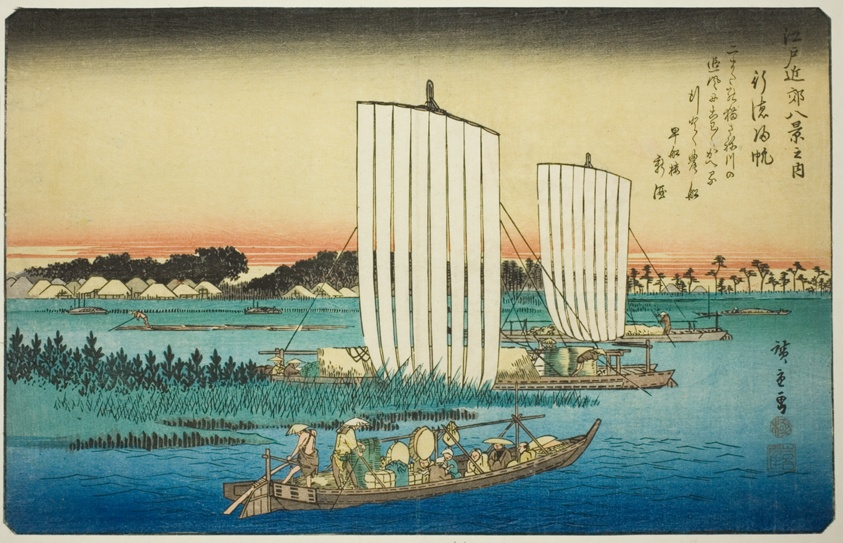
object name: Print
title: Returning Sails at Gyotoku (Gyotoku no kihan), from the series "Eight Views in the Environs of Edo (Edo kinko hakkei no uchi)"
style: Japanese (culture or style)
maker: Utagawa Hiroshige 歌川 広重; Japanese, 1797-1858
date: c. 1837/38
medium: Color woodblock print; oban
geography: Japan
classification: woodblock print; print; asian art